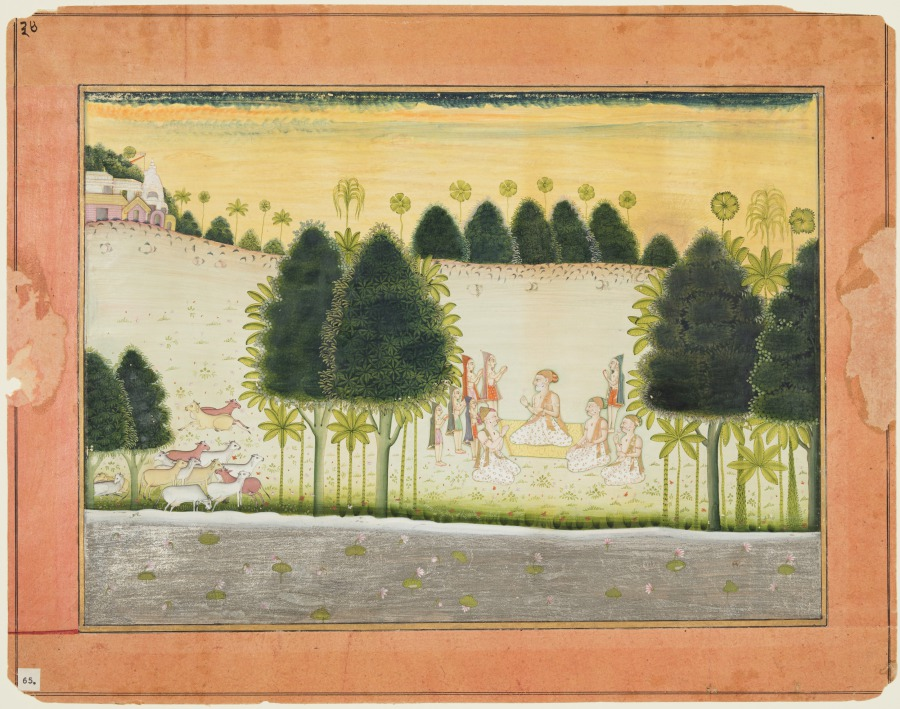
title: Nanda and the Elders in Council with the Cowherds, from a Bhagavata Purana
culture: Northwestern India, Rajasthan, Rajput Kingdom of Bikaner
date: c. 1690–1700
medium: Gum tempera, silver, and gold on paper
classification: Painting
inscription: a[dhyāye] 26 pāno. naṃda ji āgai gopa śrī kasna kī asatudī karai bai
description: The glowing hues and exquisite treatment of the figures and vegetation transport the viewer to the mythic realm of the Hindu god Krishna. Nanda, the lead elder of the cowherder village, sits amid the village council, larger than the others. After witnessing the divine and superhuman activities of Krishna, the cowherders approached Nanda and asked him for an explanation.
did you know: Each of the cowherd boys wears a different color hood.